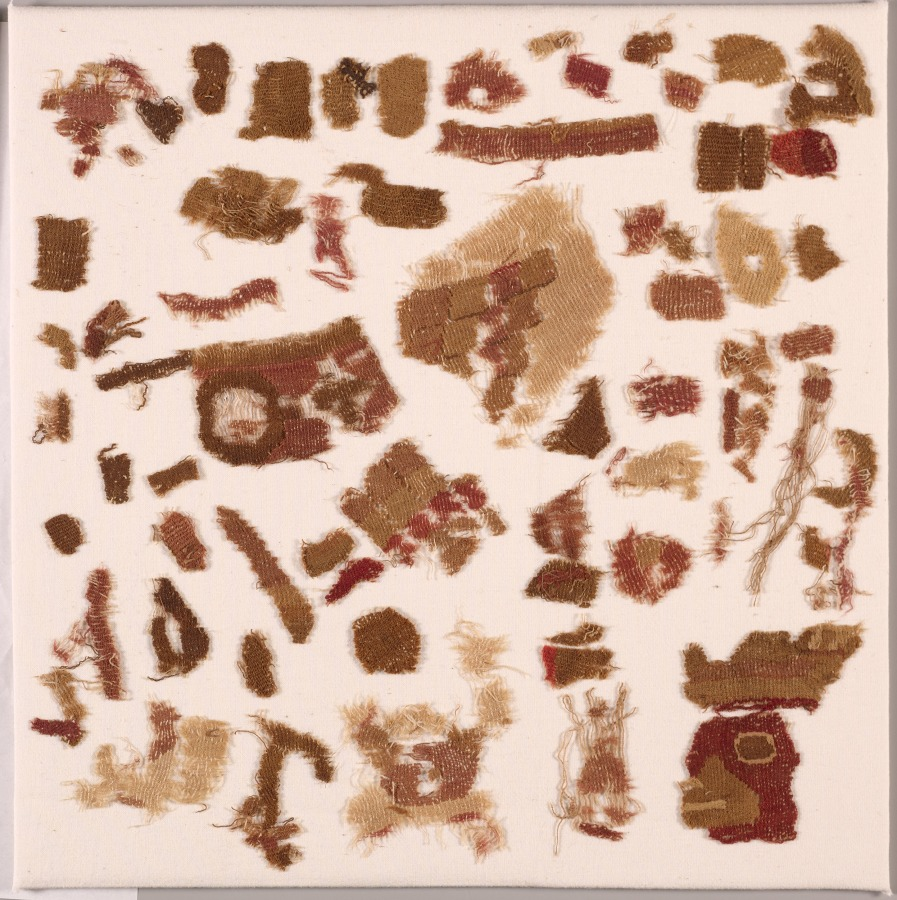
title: Loose Textile Fragments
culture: Peru, Moche, north coast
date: c. 50–650 CE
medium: cotton and camelid fiber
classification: Textile